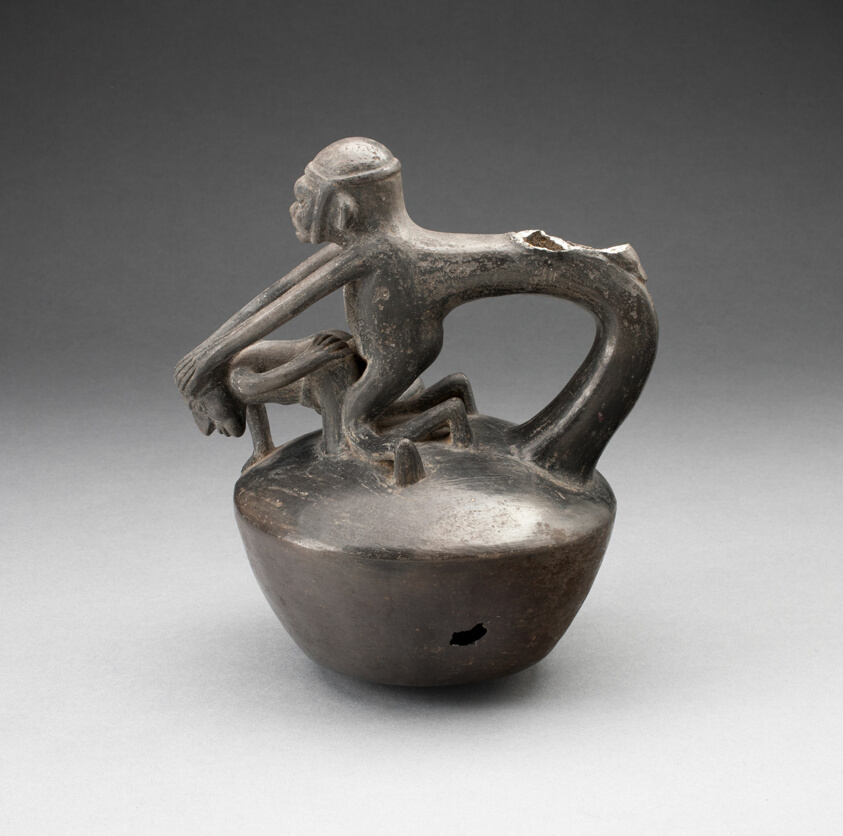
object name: Vessel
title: Stirrup Spout Vessel Depicting Erotic Scene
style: chimú, late intermediate period, Pre-Columbian, americas, Arts of the Americas, andean, andes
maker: Chimú (North coast, Peru)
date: 1100–1470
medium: Ceramic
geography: Peruvian North Coast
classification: blackware (black basaltes); earthenware; ceramics; vessel; art of the americas